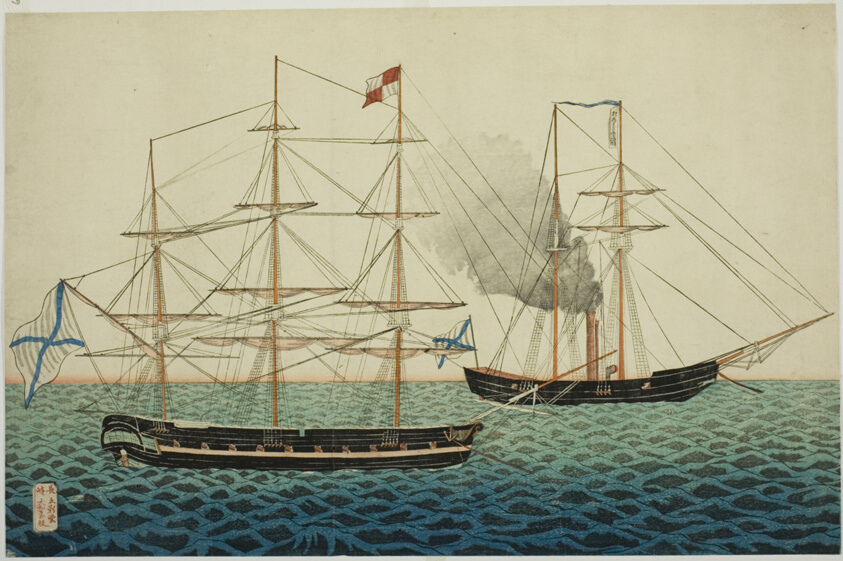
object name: Print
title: Russian Vessels, from the Album of seven prints of Russian Army and Warship (Roshia seigi shashin kan)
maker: Kawahara Keiga; Japanese, 1786-1860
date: 1853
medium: Color woodblock print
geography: Japan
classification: woodblock print; print; asian art